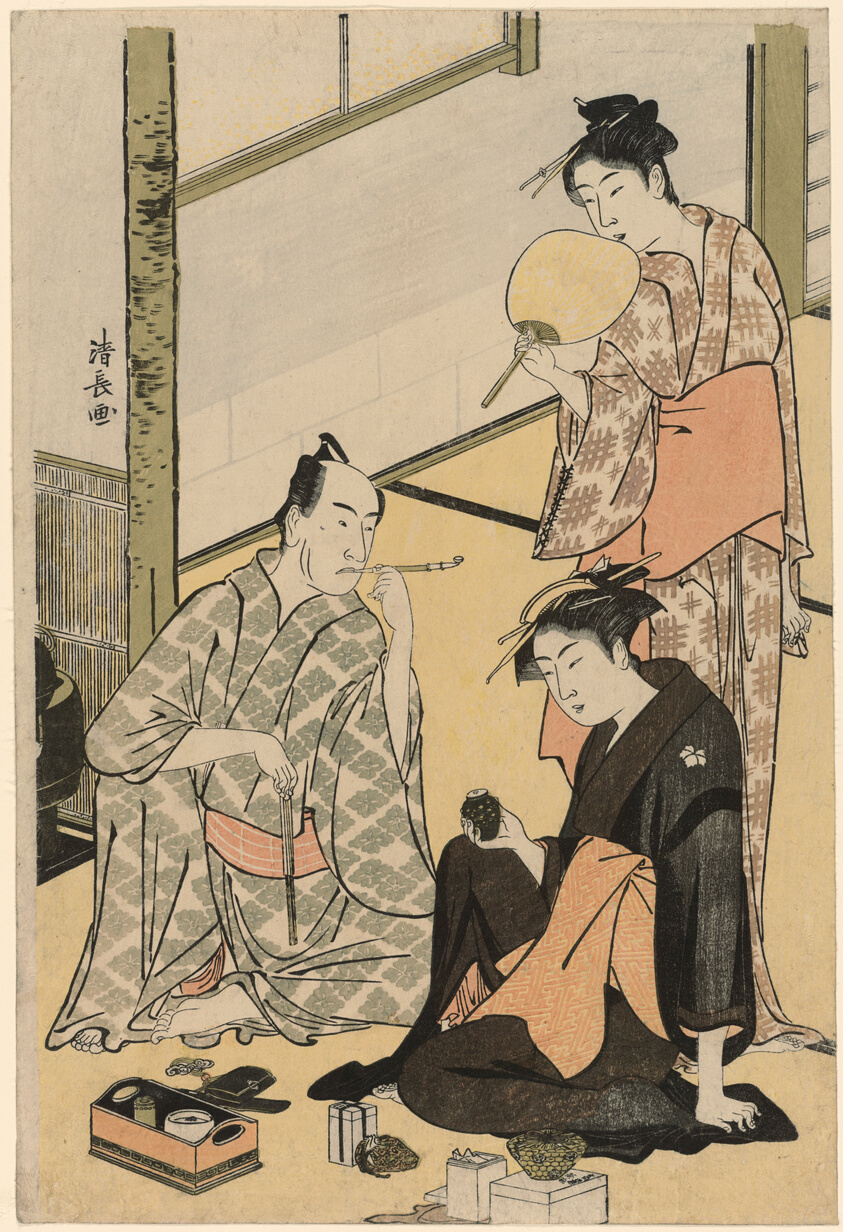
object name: Print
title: The Actor Matsumoto Koshiro IV with his family, from an untitled series of four prints showing Actors in private life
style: Japanese (culture or style)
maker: Torii Kiyonaga (Japanese, 1752-1815)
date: c. 1783/84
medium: Color woodblock print; oban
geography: Japan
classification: woodblock print; print; asian art